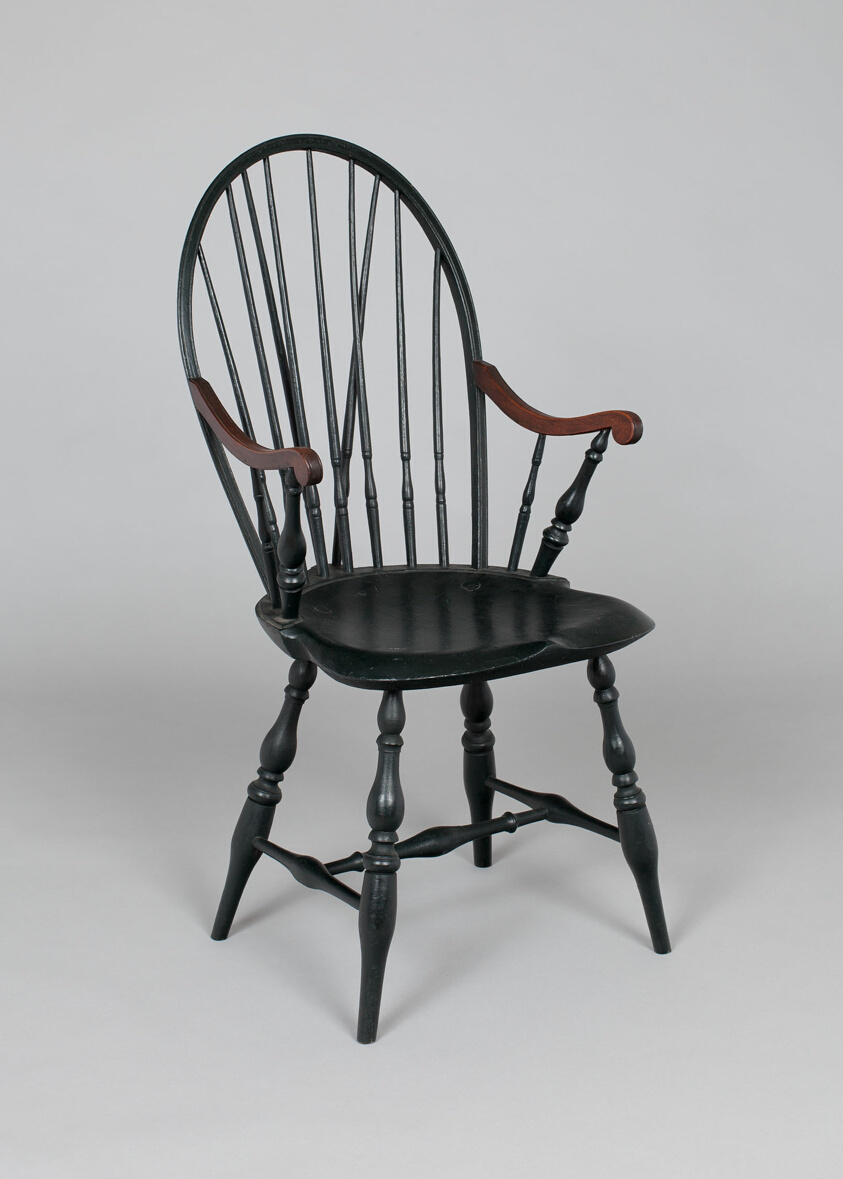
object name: Furniture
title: Armchair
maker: Artist unknown (American, 18th–19th century); Rhode Island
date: 1750–1800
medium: White pine, hickory, maple, and mahogany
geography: Rhode Island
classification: seating; furniture; american decorative arts; american arts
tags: furniture